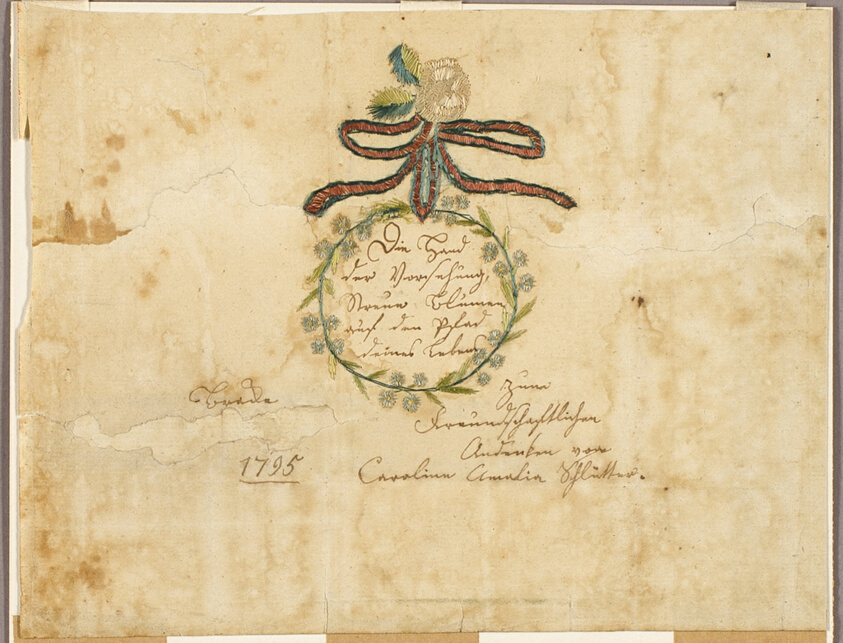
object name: Drawing and Watercolor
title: May the Hand of Providence Strew Flowers on the Path of Your Life (valentine)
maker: Carolina Amalia Schutler (German, 18th century)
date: 1795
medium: Collaged elements and pen and brown ink on cream laid paper (discolored)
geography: Germany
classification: collage; valentine; prints and drawing; paper